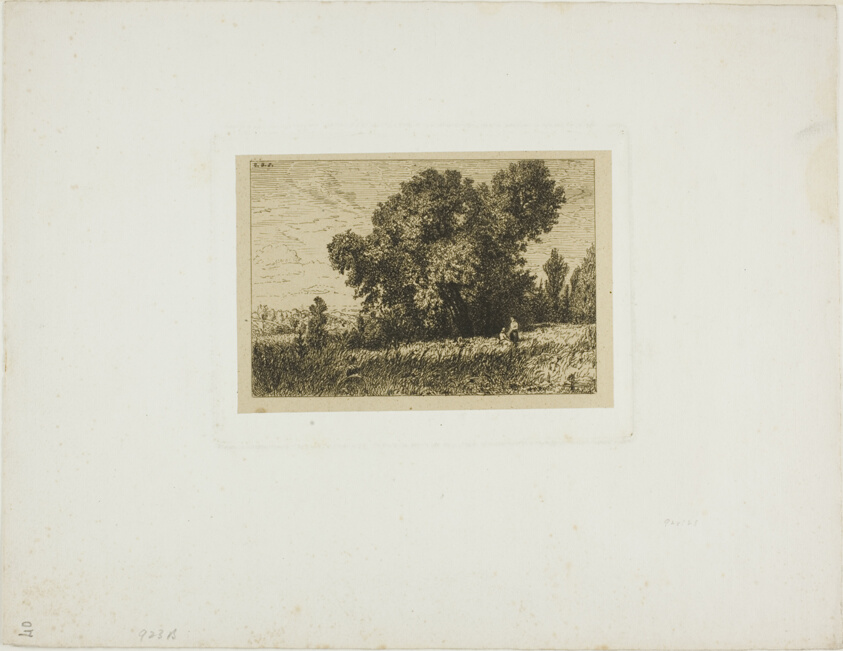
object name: Print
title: Isle of Aligre Landscape, with Two Women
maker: Charles Émile Jacque (French, 1813-1894)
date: 1844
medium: Etching on tan China paper laid down on ivory wove paper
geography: France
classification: etching; print; prints and drawing